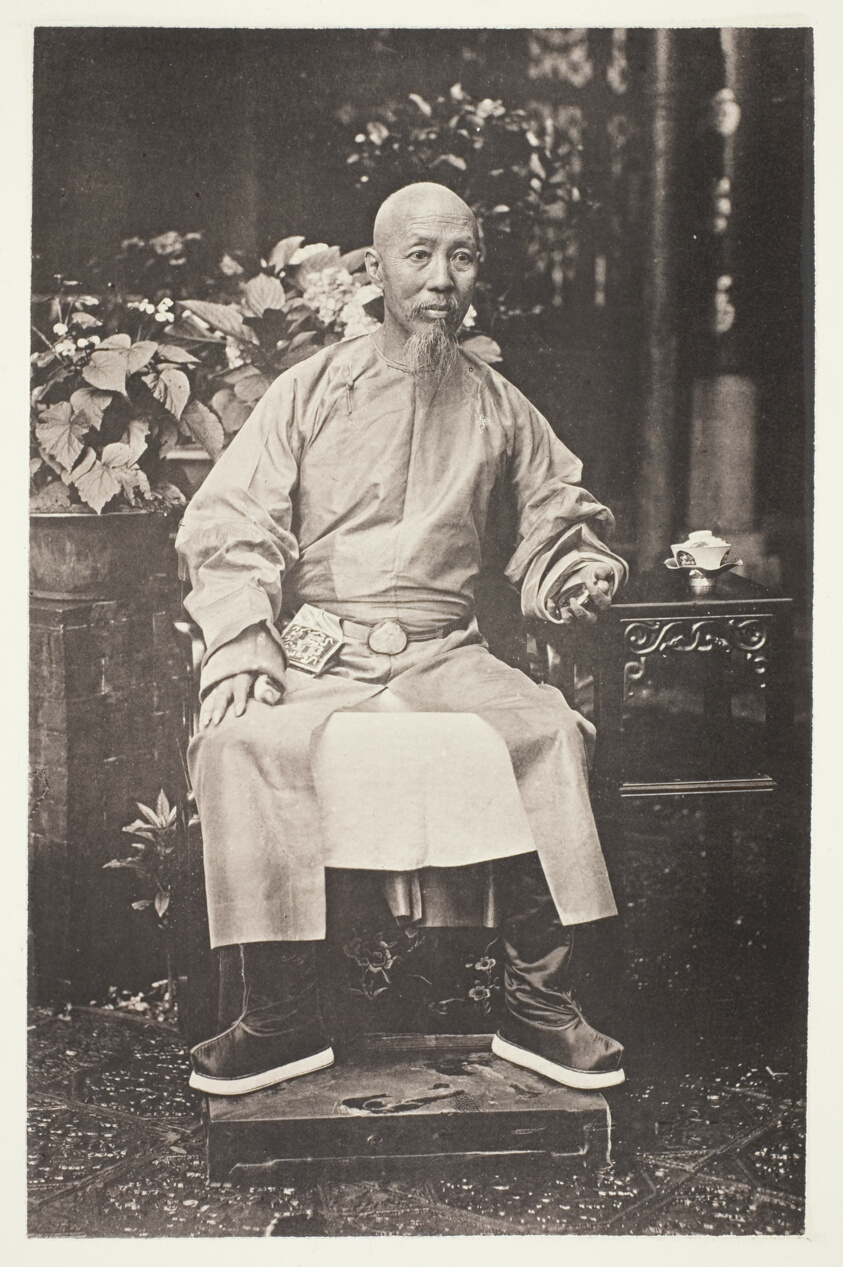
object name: Photograph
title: Jui-Lin, Governor-General of the Two Kwang Provinces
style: 19th century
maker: John Thomson (Scottish, 1837–1921)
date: c. 1868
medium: Collotype, pl. XIII from the album "Illustrations of China and its People, Volume I" (1873)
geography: Scotland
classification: photography; photograph